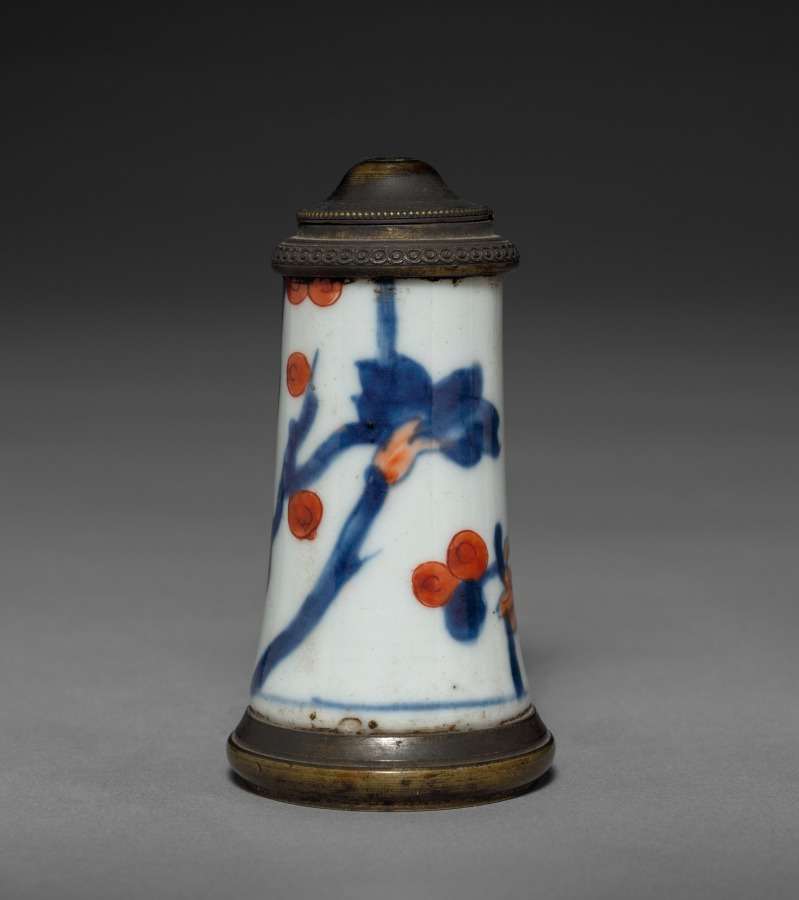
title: Imari Ware (?) Container with Brass Mounts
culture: Japan, Edo period (1615–1868)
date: late 1600s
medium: porcelain with brass mounts (possibly Hizen ware, Arita type, Imari style)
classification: Ceramic